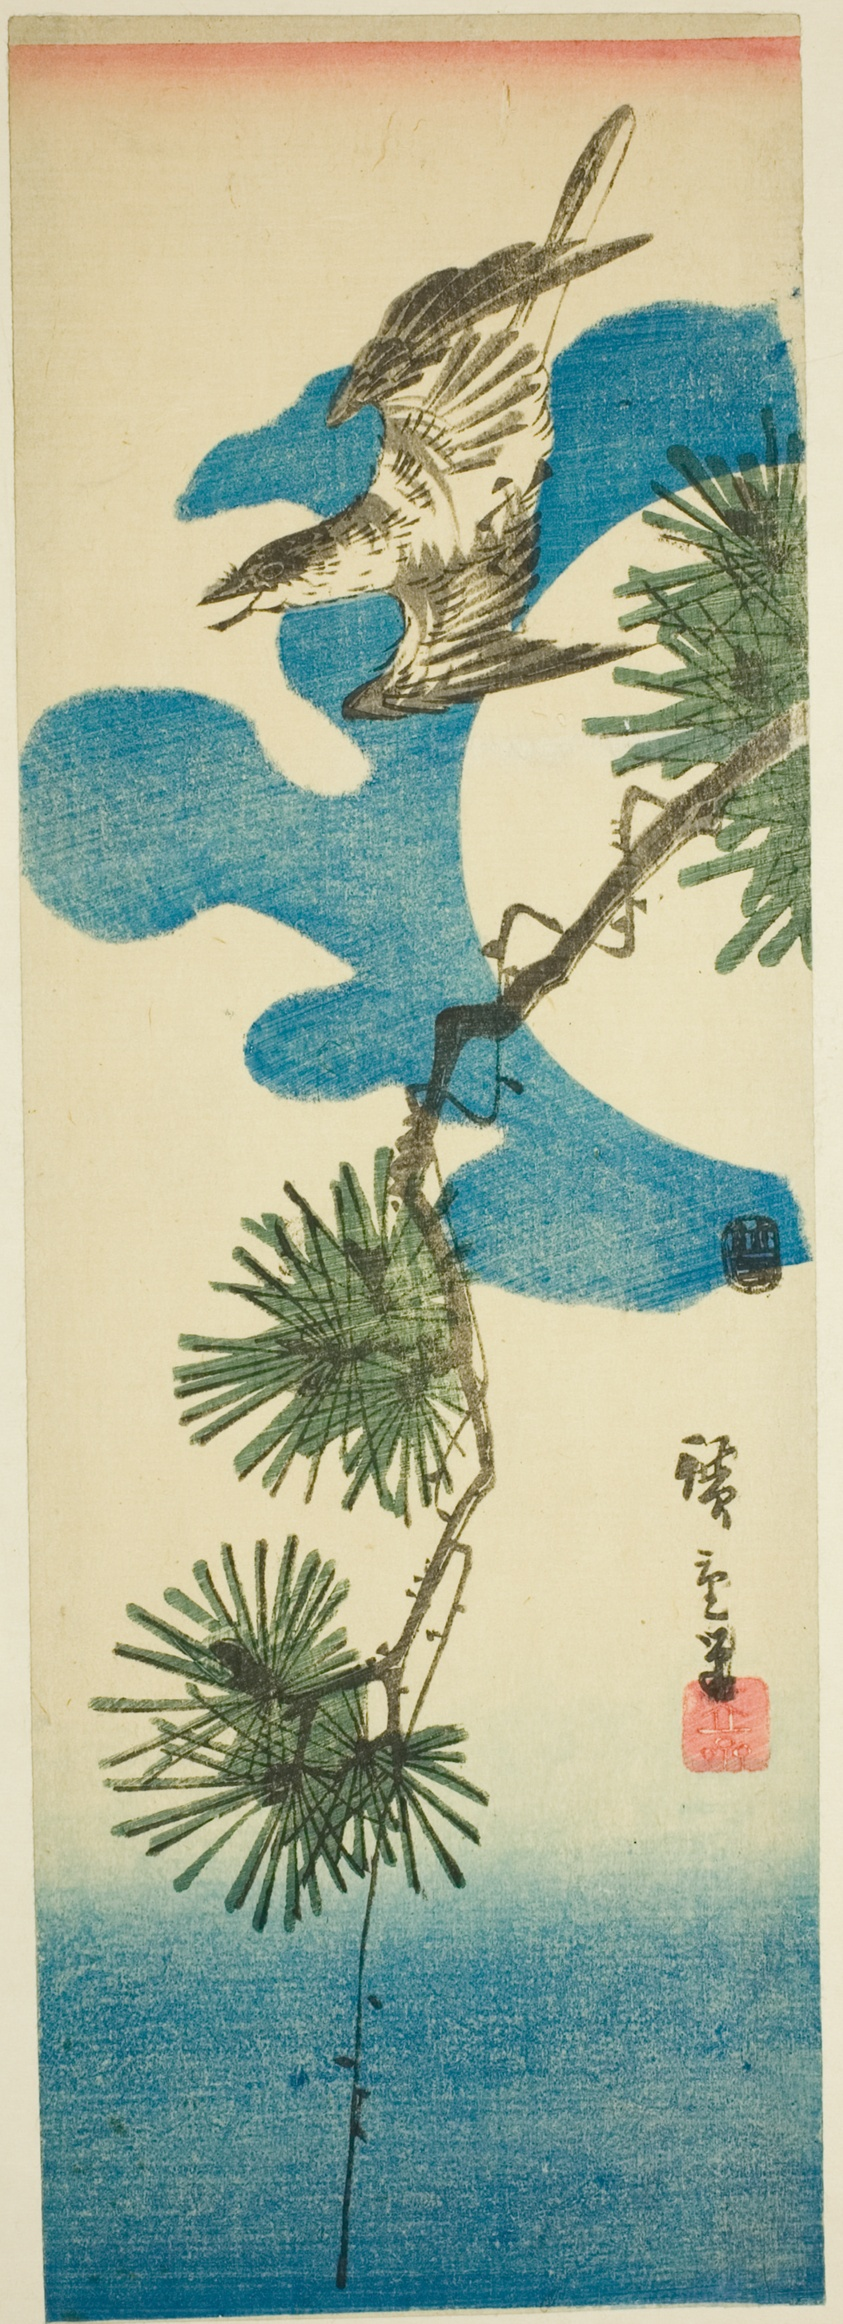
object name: Print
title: Cuckoo, Pine Brach, and Full Moon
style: Japanese (culture or style)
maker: Utagawa Hiroshige 歌川 広重; Japanese, 1797-1858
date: c. 1843/47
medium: Color woodblock print; aitanzaku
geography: Japan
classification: woodblock print; print; asian art